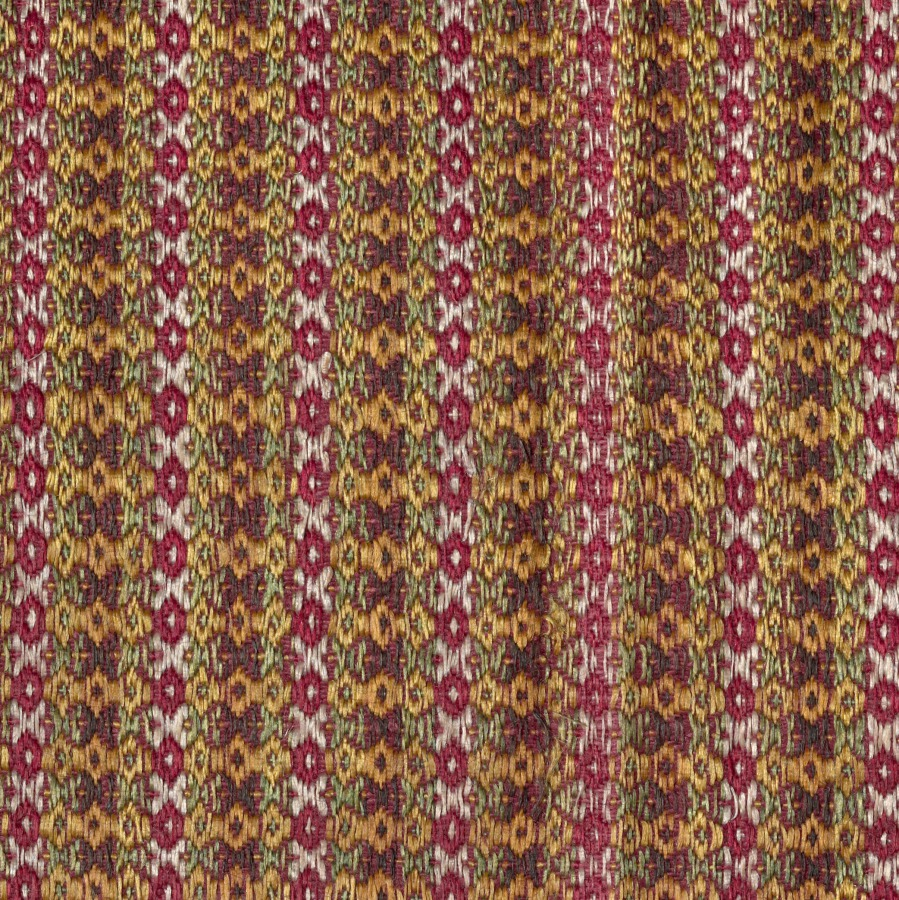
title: Woven Textile Fragment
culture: Western India, Surat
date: 1700s or 1800s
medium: Cotton and silk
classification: Textile